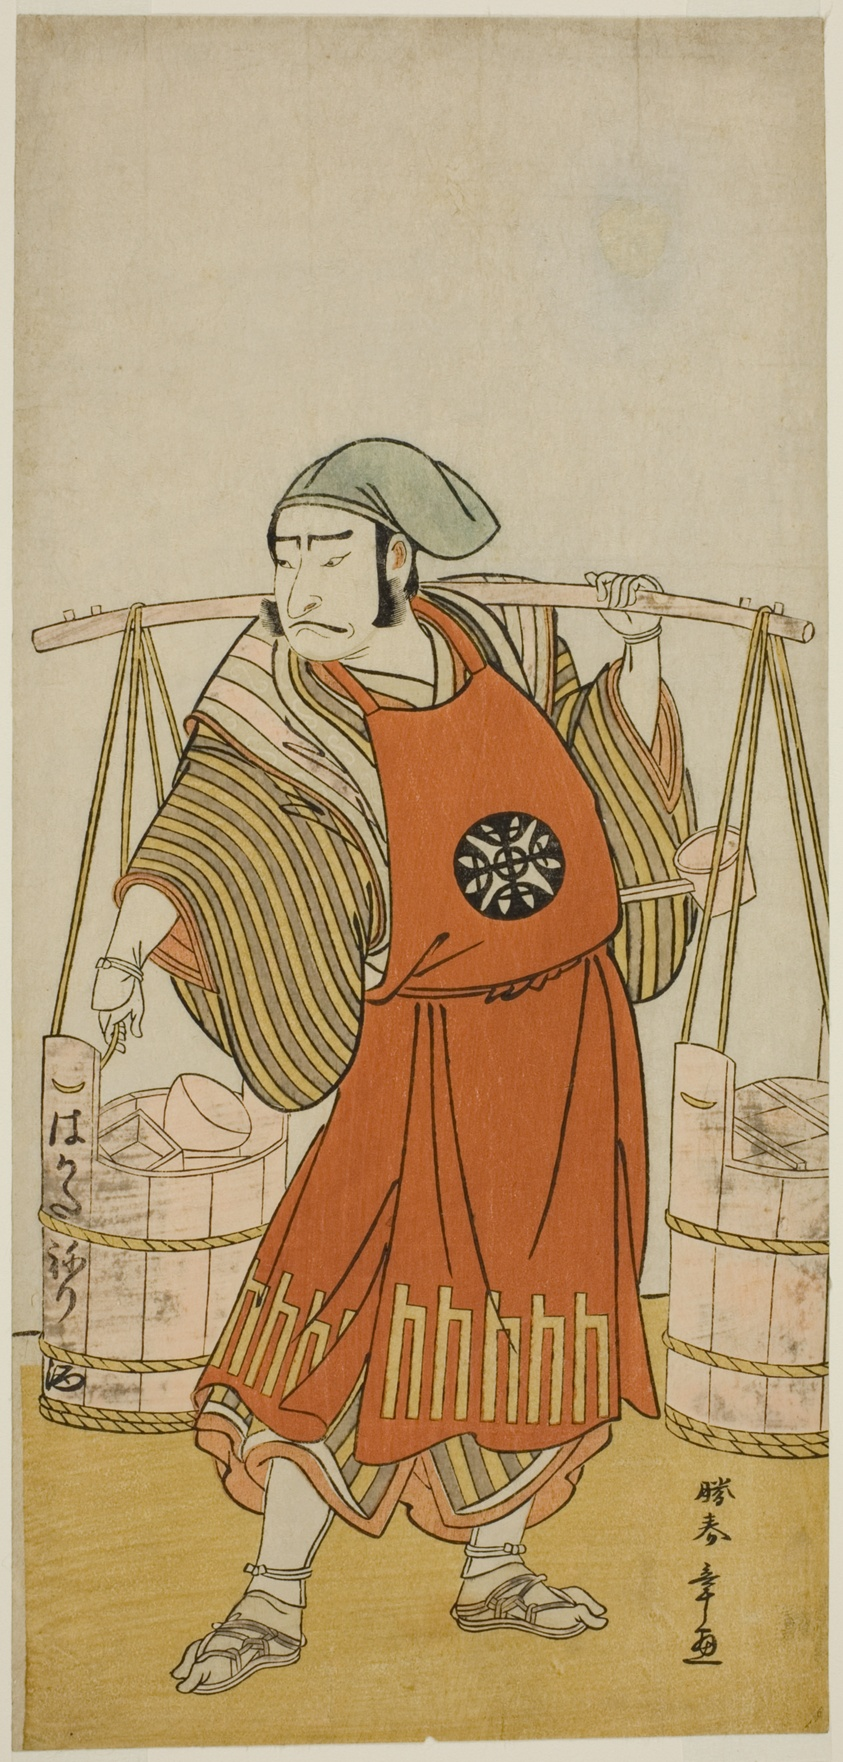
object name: Print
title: The Actor Nakamura Nakazo I as Nagasaki Kageyuzaemon Disguised as Gorohachi the Sake Seller, in the Play Hikitsurete Yagoe Taiheiki, Performed at the Morita Theater in the Eleventh Month, 1776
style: Japanese (culture or style)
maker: Katsukawa Shunsho 勝川 春章; Japanese, 1726-1792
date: c. 1776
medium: Color woodblock print; hosoban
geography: Japan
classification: woodblock print; print; asian art